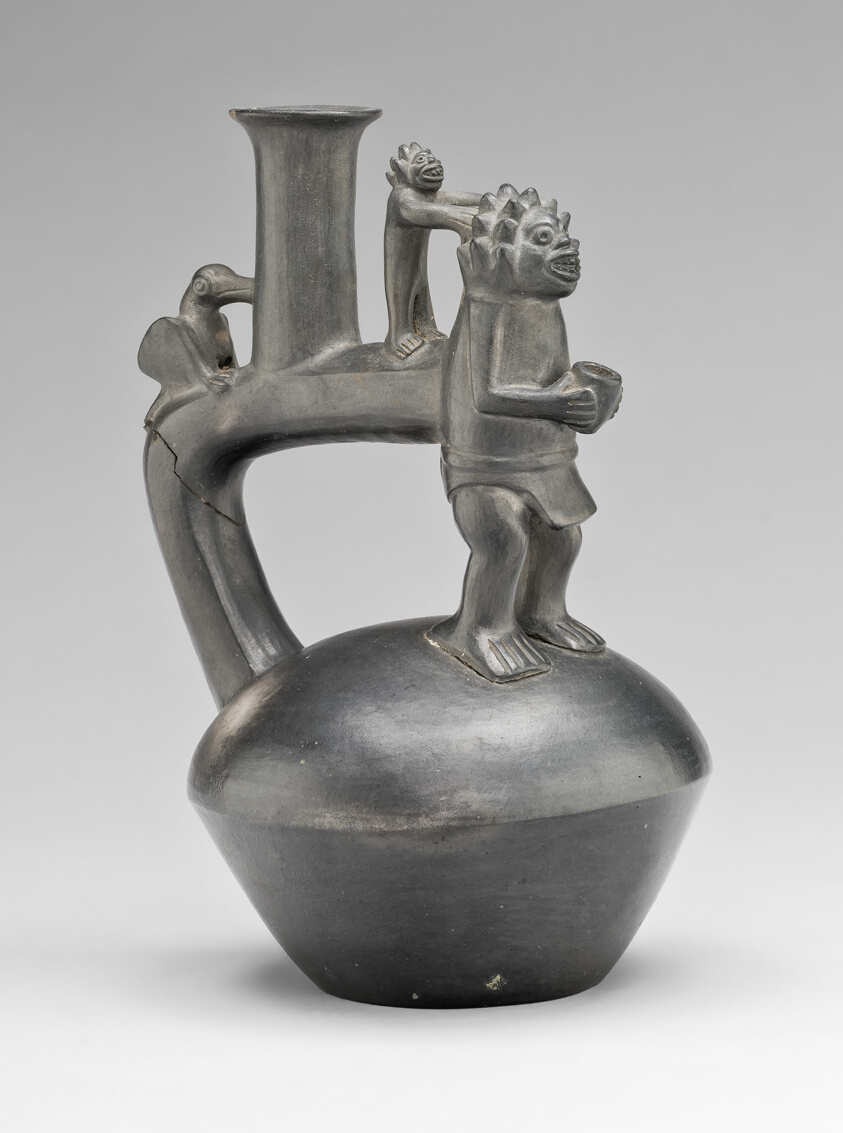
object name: Vessel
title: Vessel Depicting a Standing Figure with an Attendant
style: chimú, late intermediate period, Pre-Columbian, americas, inca, andes, Arts of the Americas, andean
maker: Chimú-Inca; North coast, Peru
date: 1200–1450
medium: Ceramic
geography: Peruvian North Coast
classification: blackware (black basaltes); earthenware; ceramics; vessel; art of the americas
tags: figures (representations), bird, ritual